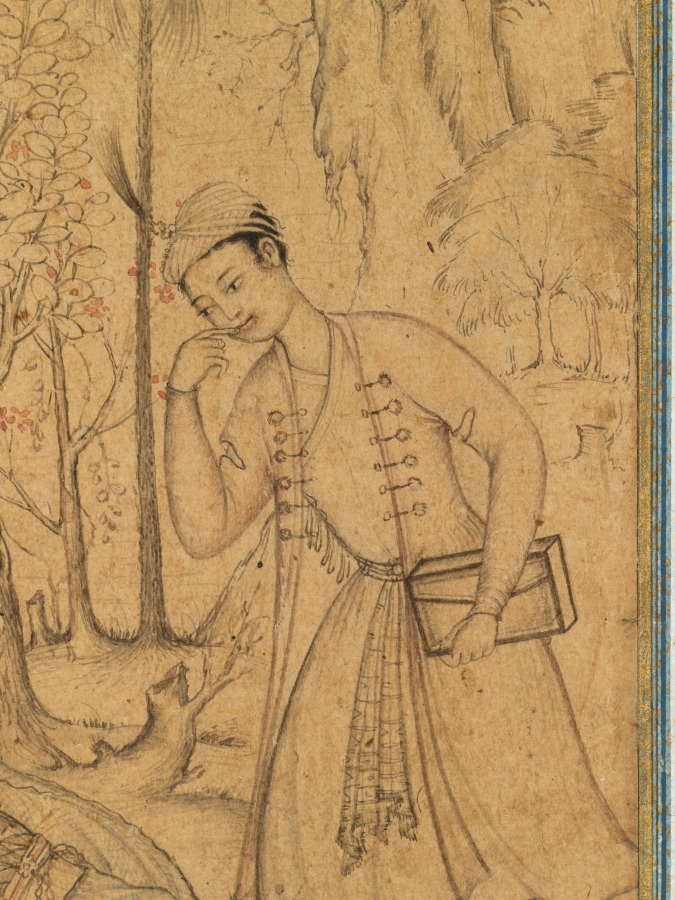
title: A holy man prostrating himself before a learned prince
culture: Mughal India, court of Akbar (reigned 1556–1605)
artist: attributed to Manohar (Indian, active late 1500s)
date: c. 1585; border added probably 1700s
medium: ink on paper, laid down with borders of gold-decorated blue paper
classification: Painting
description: Manohar riffs on the work of his father, Basavana, by showing a holy man bowing at the feet of a prince, instead of another holy man. Those who could recognize the relationship between this work and that of his father (CMA 2013.296) would impress gatherings of courtly connoisseurs, who prided themselves on being able to identify the hand of individual artists just by looking at the paintings. Recitation of poetry would accompany the viewing of paintings and drawings. Virtuoso artists reflected glory on their patrons. As an Islamic ruler, Akbar and his court participated in these activities—a new purpose for art that Indian artists had to learn.